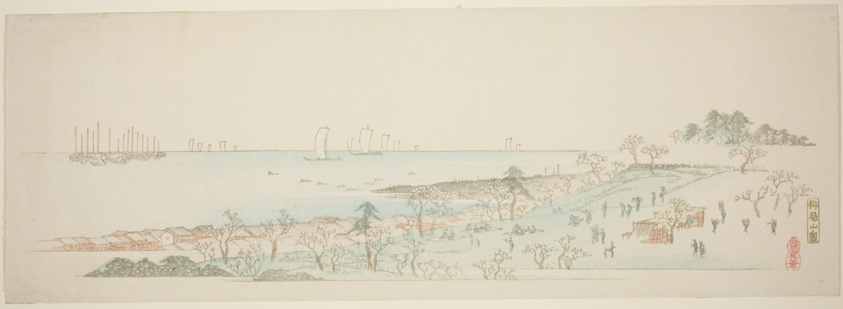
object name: Print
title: View of Goten Hill (Gotenyama no zu), from the series "Thirteen Views of the Environs of Edo"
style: Japanese (culture or style)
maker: Utagawa Hiroshige 歌川 広重; Japanese, 1797-1858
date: c. 1837/44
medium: Color woodblock print; ebangire, surimono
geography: Japan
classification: woodblock print; print; asian art